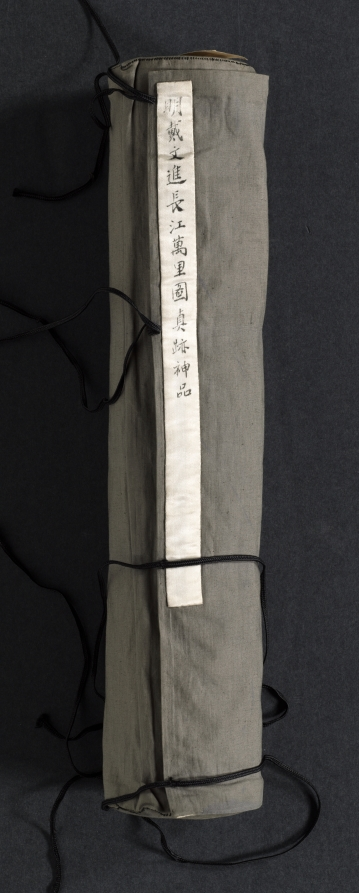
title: Ten Thousand Li of the Yangzi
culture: China, Ming dynasty (1368–1644)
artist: Dai Jin (Chinese, 1388–1462)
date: c. 1400s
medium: Handscroll; ink and color on paper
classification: Painting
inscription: Two colophons at end. Artist's seals: Dai Jin 戴進 and Wenjin 文進.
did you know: Dai Jin is traditionally considered the founder of the Zhe School, a style of landscape painting.